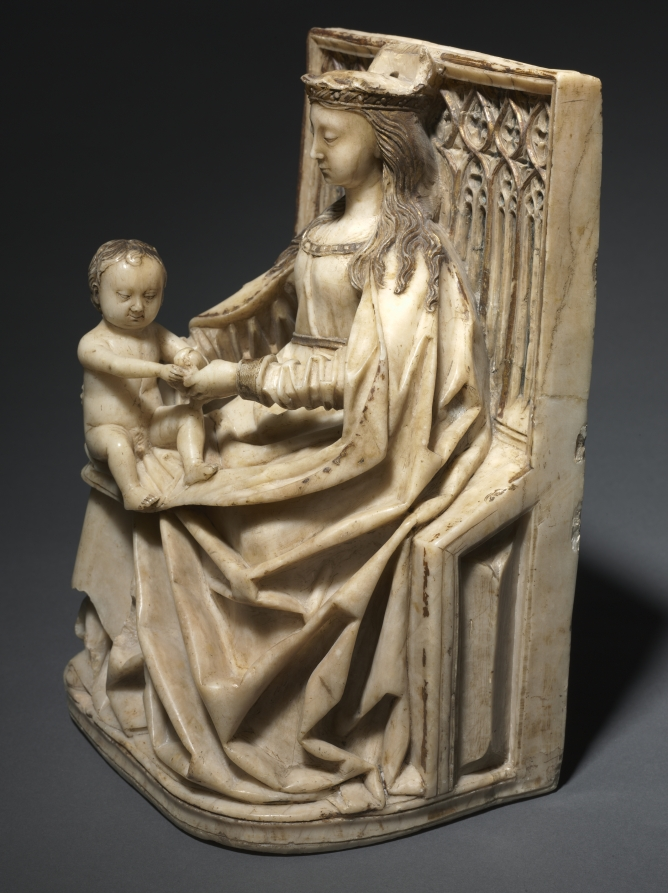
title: Enthroned Virgin and Child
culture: Spain, Burgos, 15th century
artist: Gil de Siloé (Spanish, active c. 1475–1505)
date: c. 1480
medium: alabaster with traces of gilding and polychromy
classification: Sculpture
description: The seated Virgin Mary with Christ is one of the most popular themes in Christian art of the Middle Ages. Alabaster was an ideal material to depict the fleshiness of Jesus, the lush folds of Mary’s cloak, and the fine details of the throne and gown. Christ is reaching for something in his mother’s hand that is now unrecognizable because alabaster tends to break or wear away quickly. It may have been a book or a piece of fruit. Given its small size, it is likely that this sculpture was intended for private use.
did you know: This sculpture was possibly made for Queen Isabella, the Spanish ruler who sponsored Christopher Columbus.